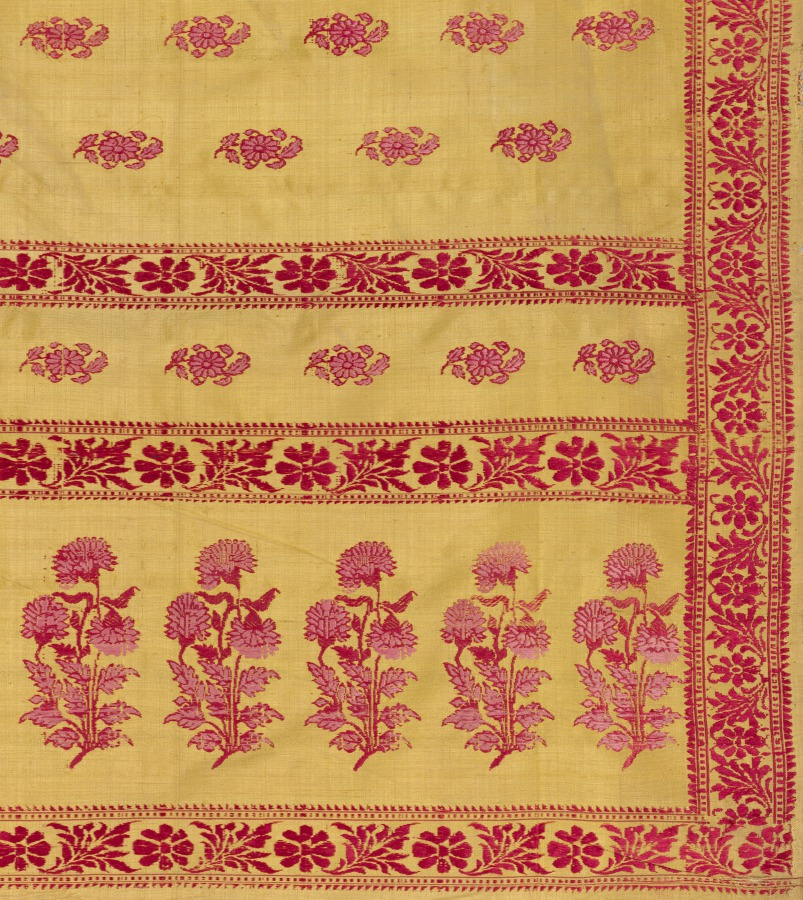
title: Part of a Sari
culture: India, Surat, 19th - 20th century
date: 1800s - early 1900s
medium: brocade, silk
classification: Textile